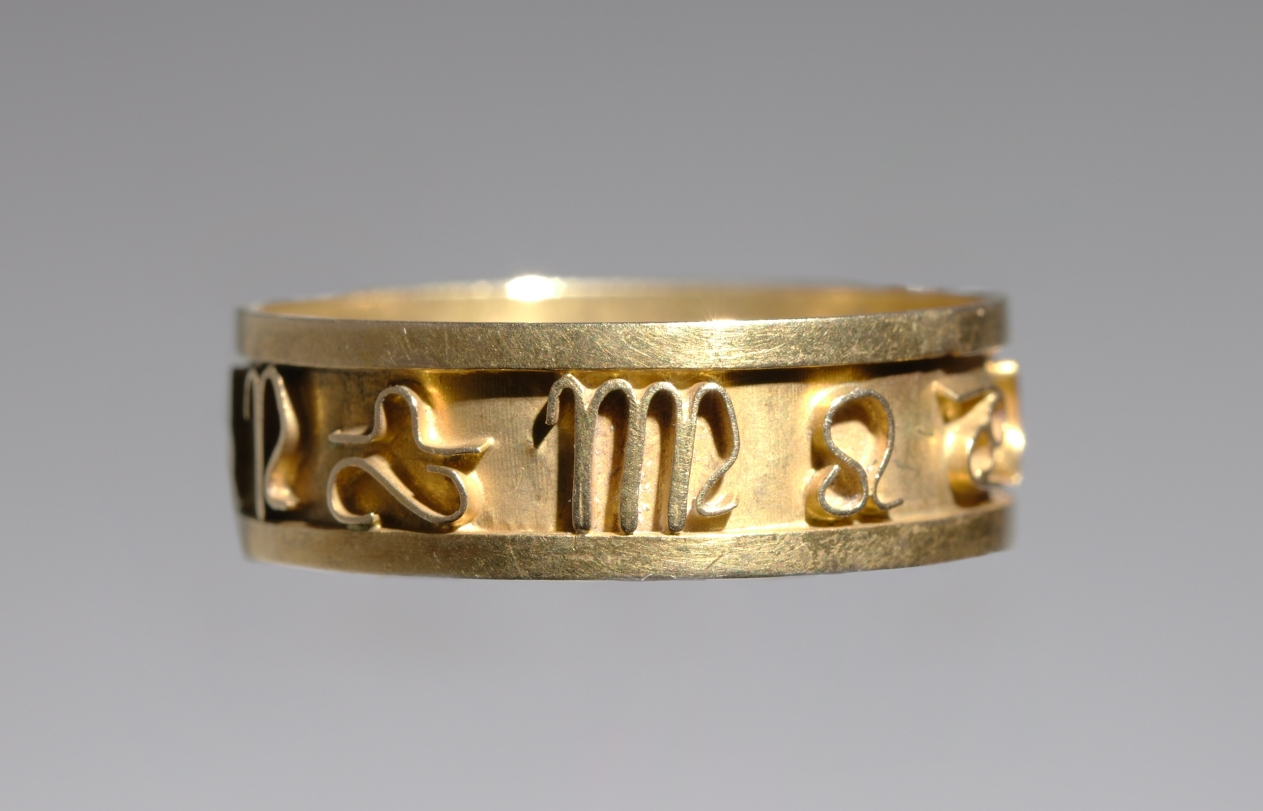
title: Ring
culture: Africa, North Africa, unknown maker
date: 1700s–1800s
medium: Gold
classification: Jewelry